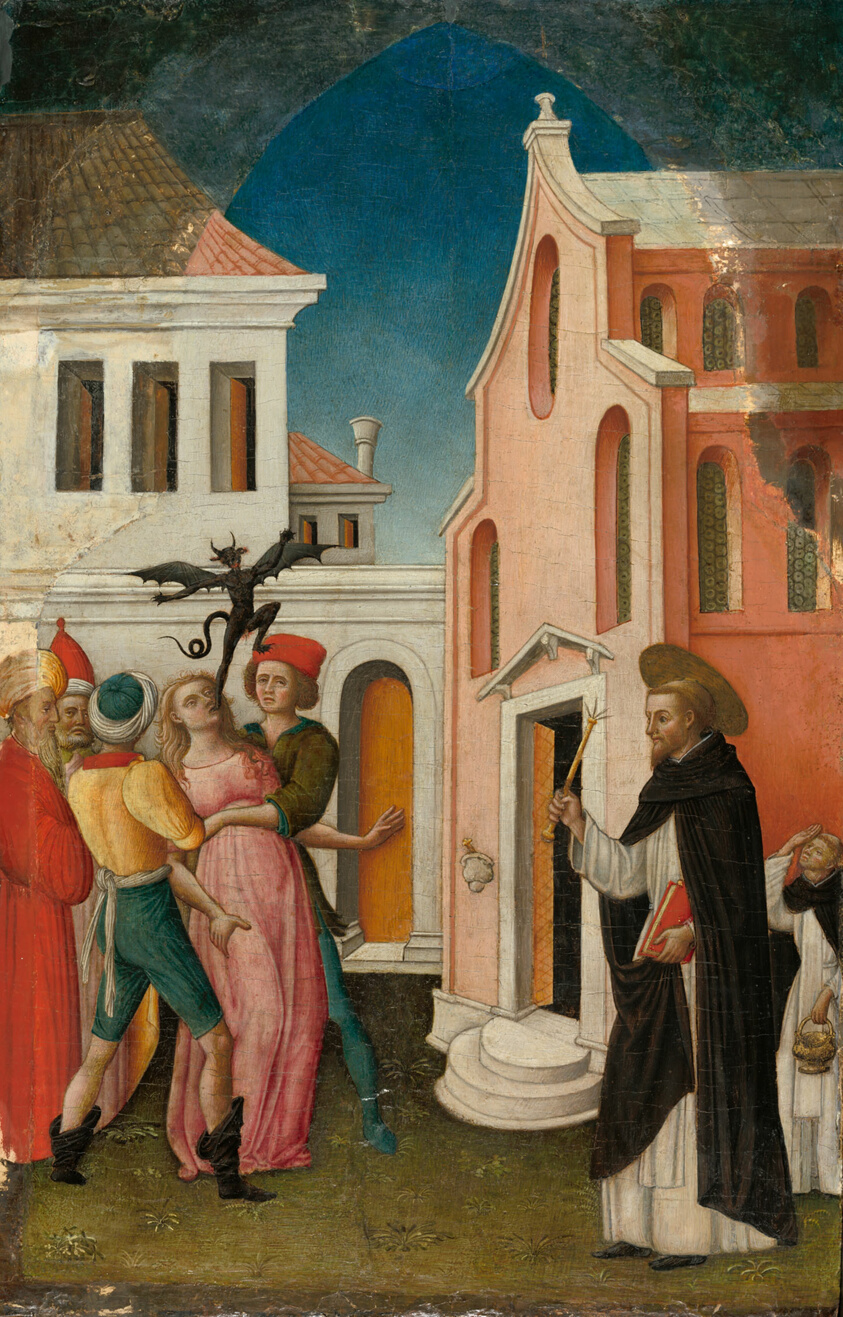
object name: Painting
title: Saint Peter Martyr Exorcizing a Woman Possessed by a Devil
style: 15th century, Renaissance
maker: Antonio Vivarini (Italian, about 1415–1476/84)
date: 1445/55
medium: Tempera on panel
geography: Italy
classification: tempera; paint; Italian; painting; european painting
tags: saints, woman, devil/satan/lucifer/beezelbub/mephistopheles, satan, men, religion, religious, religious figures, religious attire, religious scenes, Christian subjects, Christianity, building, towns, buildings